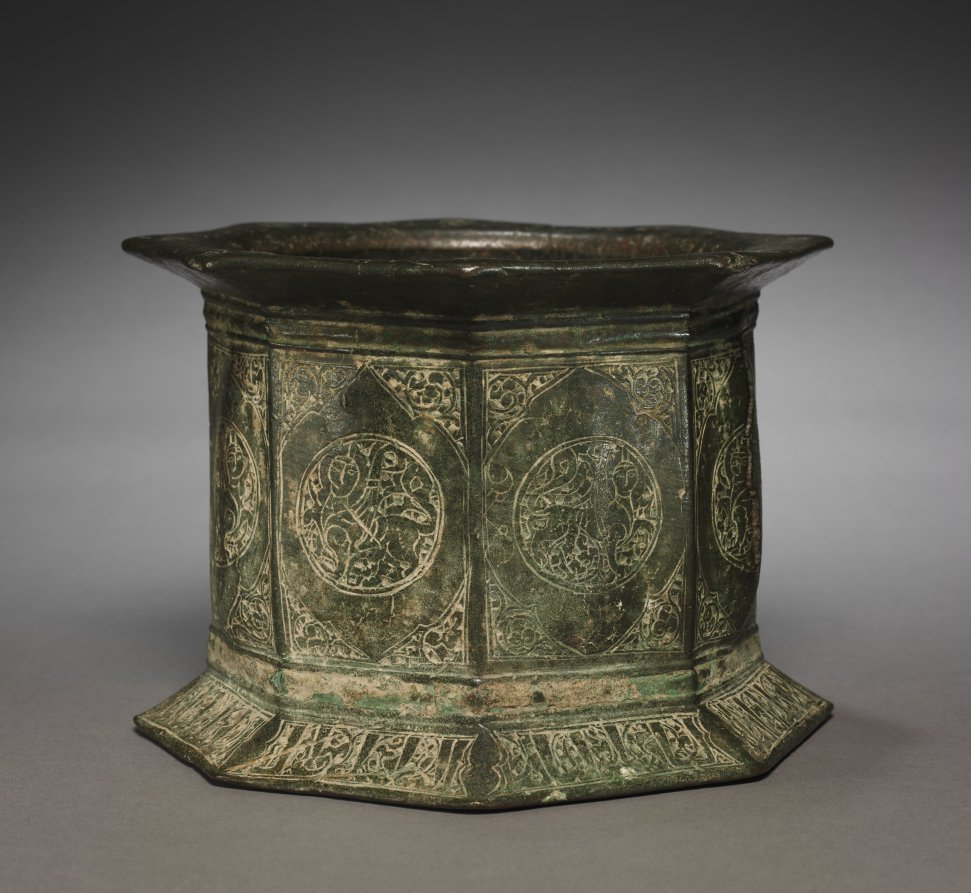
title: Mortar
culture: Iran, Seljuq period (1037–1194)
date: 1100s–1200s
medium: Cast bronze with incised decoration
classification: Metalwork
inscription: Thulth inscription on the Base, undeciphered